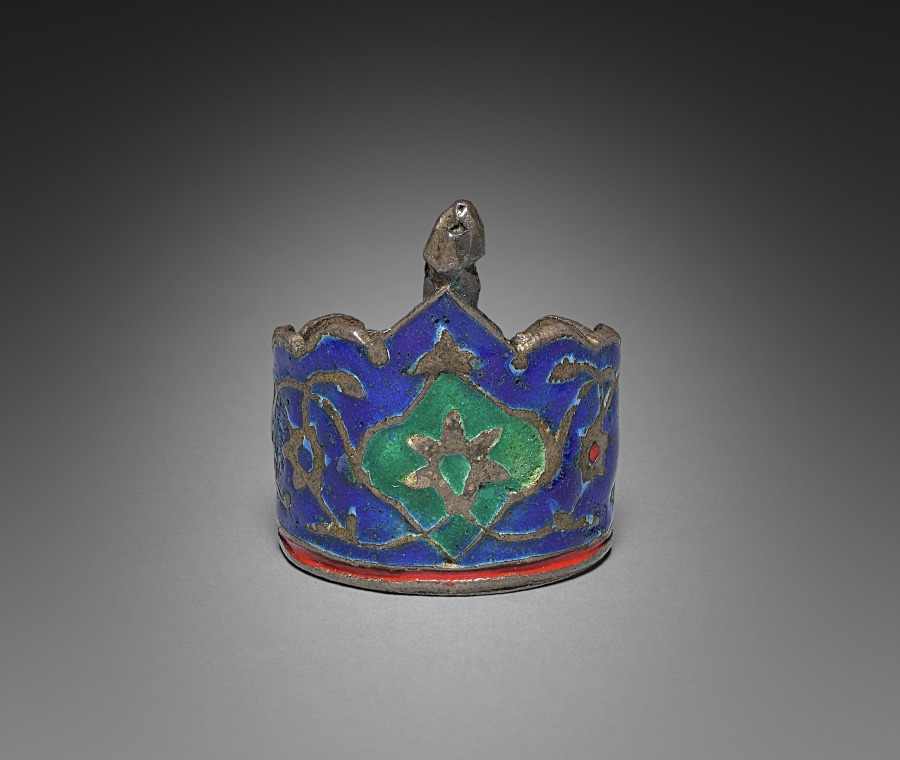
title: Ring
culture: India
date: 1800s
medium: silver and enamel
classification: Jewelry